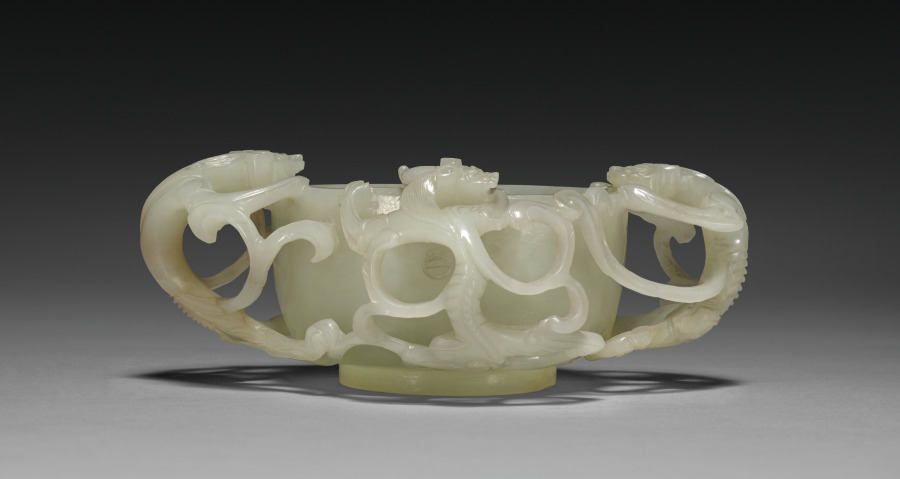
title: Cup with Dragon Handles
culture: China, Qing dynasty (1644-1911), Kangxi reign (1662-1722)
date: 1662–1722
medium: Pale gray-green white jade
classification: Jade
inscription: 萬壽長春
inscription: 壽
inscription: 子剛造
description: Three dragons, auspicious symbols for good fortune, grasp the rim of this bowl. A large shou (longevity) character is visible on the outside wall. Drinking cups with dragon handles were elite luxuries. The yellowish-white color and refined techniques are characteristic of Suzhou workshops that served the court, scholar-officials, and the merchant class. The optimistic attribution to Lu Zigang (late 1500s), a jade master recorded to have been active in Suzhou, suggests that its maker used the master’s name to attract wealthy clients eager to demonstrate their refined taste and connoisseurship.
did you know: Auspicious inscriptions on the base and front of the jade cup convey wishes for longevity.